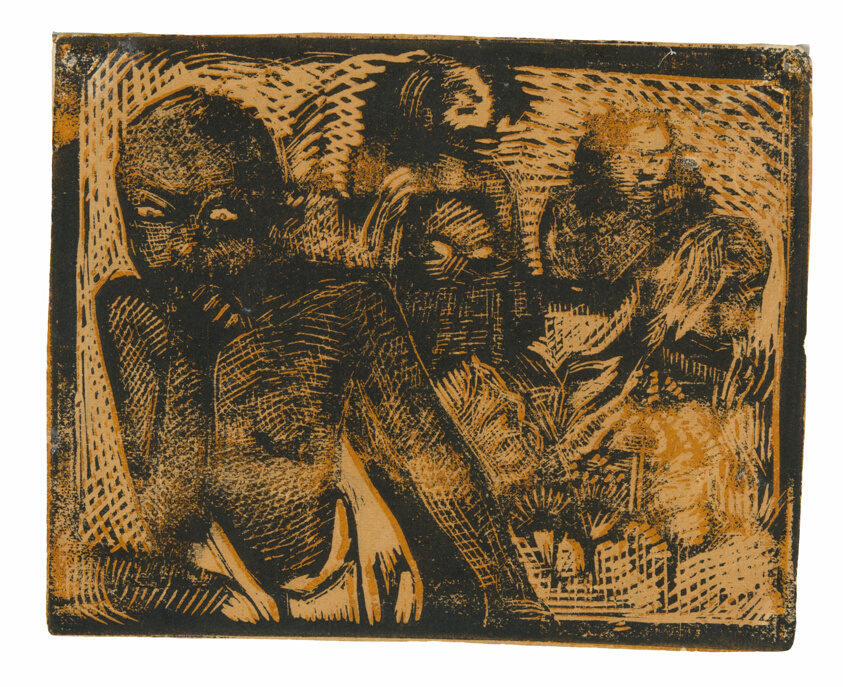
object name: Print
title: Young Maoris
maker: Paul Gauguin (French, 1848-1903)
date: 1896/97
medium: Wood-block print printed twice in yellow ocher and black ink, on cream wove notebook paper ruled in blue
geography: France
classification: woodcut; print; prints and drawing